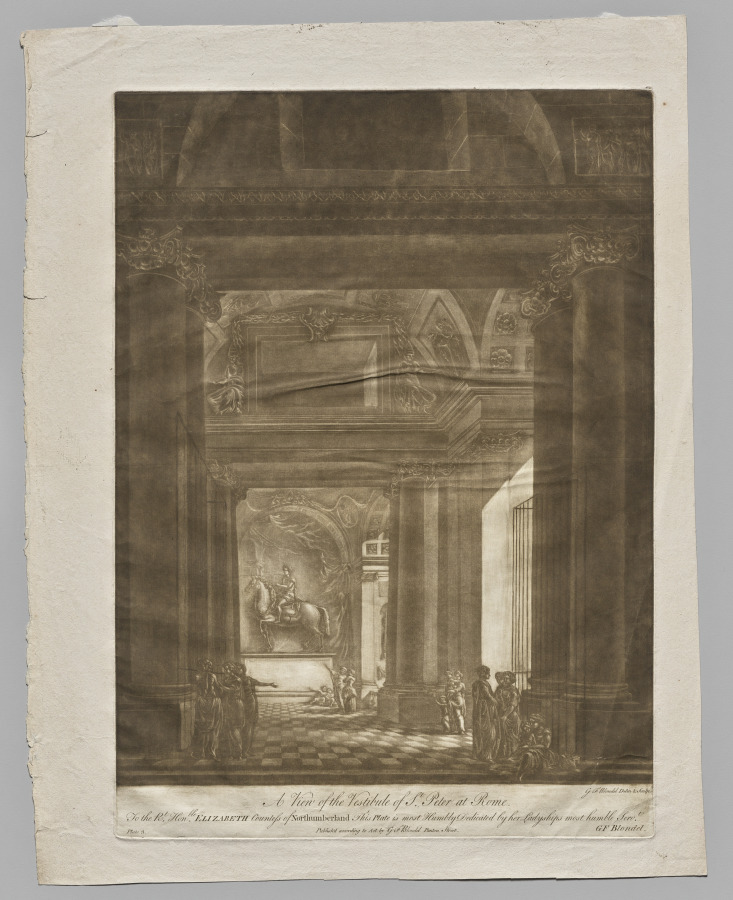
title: A View of the Vestibule of St. Peter at Rome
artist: Georges Francois Blondel (French, 1730–1800)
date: 1766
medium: mezzotint printed in sepia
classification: Print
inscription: Imprinted on recto: “A View of the Vestible ulf St. Peter at Rome”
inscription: Imprinted on recto: “G F Blondel Delin & Sculp”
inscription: Imprinted on recto: “To the Rt Hon’ble Elizabeth Countess of Northumberland This Plate is most Humbly Dedicated by her Ladyships most humble serv’t/Published according to Act by G F Blondel Panton Street/G F Blondel/Plate 3”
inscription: Watermark: Grand-Jésus stock of T. Dupuy, watermark Name of Jesus (IHS), countermark T Dupuy Fin Auvergne 1742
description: After returning from several years spent in Italy, the French printmaker George-Francois Blondel settled in London in order to take advantage of the English taste for images of Italian sites. This is one of a series of eight prints he published in 1766 depicting imagined and real Italian interiors. Using the relatively new technique of mezzotint, which creates velvety, dark tonal areas, as well as low vantage points, Blondel created towering, awe-inspiring spaces. For special patrons, he printed the plates in sepia ink, rather than in black; the CMA’s set includes two of these unusual sepia impressions.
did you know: Mezzotint was relatively new at the time this print was made and had yet to be utilized for such large plates of an architectural nature as seen here.